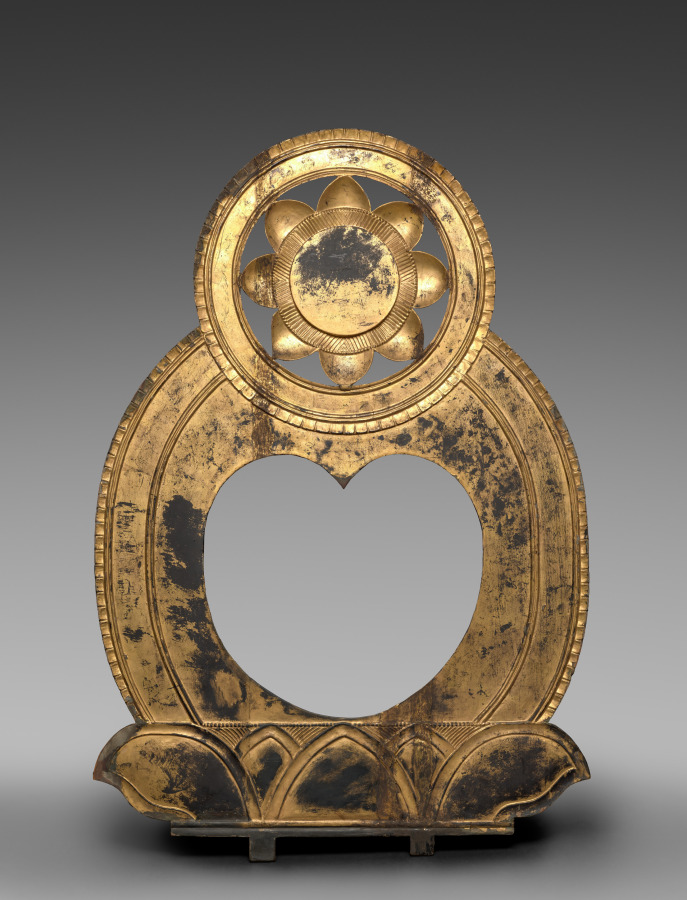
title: Seated Buddha (mandorla)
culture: Japan, Heian period (794–1185)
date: 1100s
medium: gilded wood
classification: Sculpture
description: Composed of a number of hollowed-out pieces of wood that were then covered with lacquer and gilding, this sculpture served as an image of worship in one of the small temples surrounding Kōfukuji, a major Buddhist temple in Nara, Japan. Like many Buddhas, this figure has its right hand positioned in a gesture meaning "fear not." The left hand is a replacement, so its original gesture, a clue to this Buddha's identity, is unknown. However, as the left foot is exposed over the garment, in lotus position, it may have been created as a Medicine Master Buddha, Yakushi Nyorai in Japanese, or the Buddha of our era, Shakyamuni.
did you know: This halo may not have originally belonged to this sculpture.